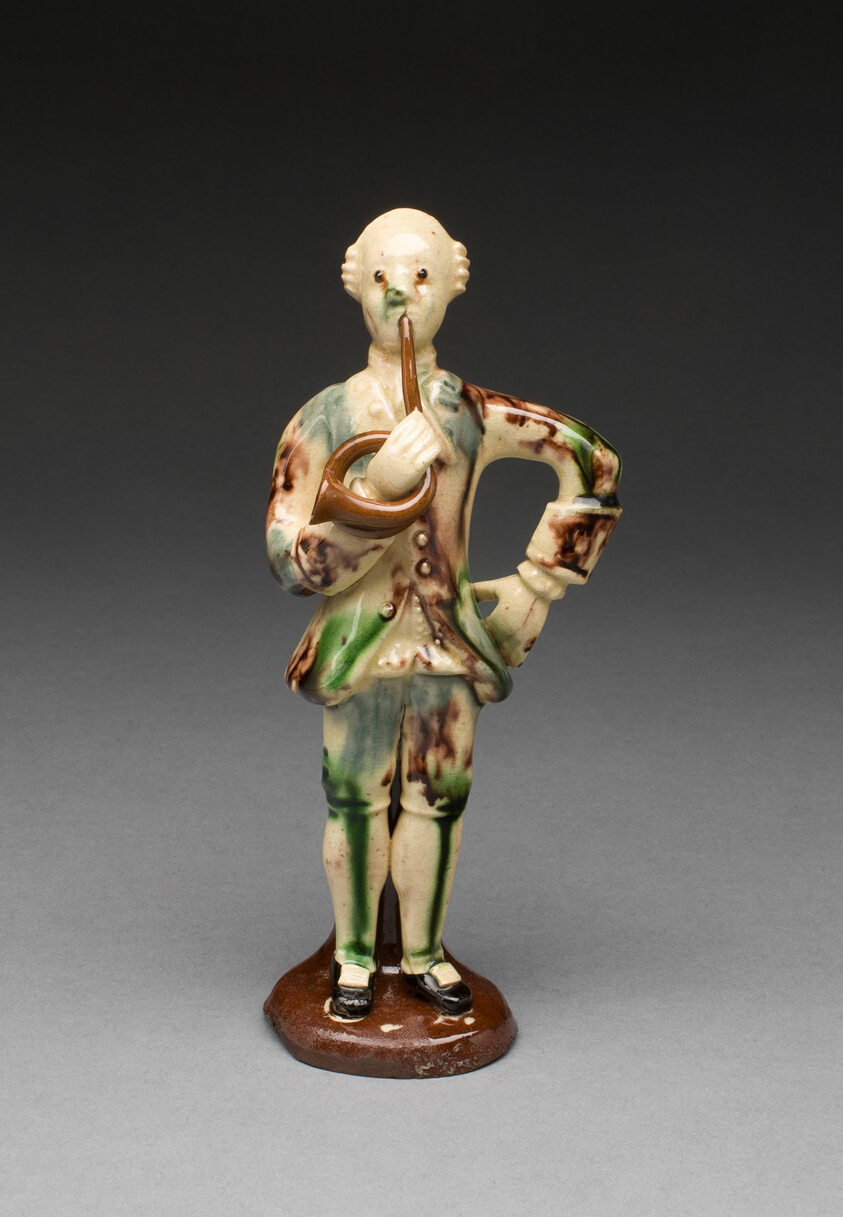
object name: Ceramics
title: Horn Player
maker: England, Staffordshire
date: 1750/70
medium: Lead-glazed earthenware (creamware and redware)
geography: Staffordshire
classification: earthenware; creamware; european decorative arts; redware; ceramics; lead-glazed earthenware